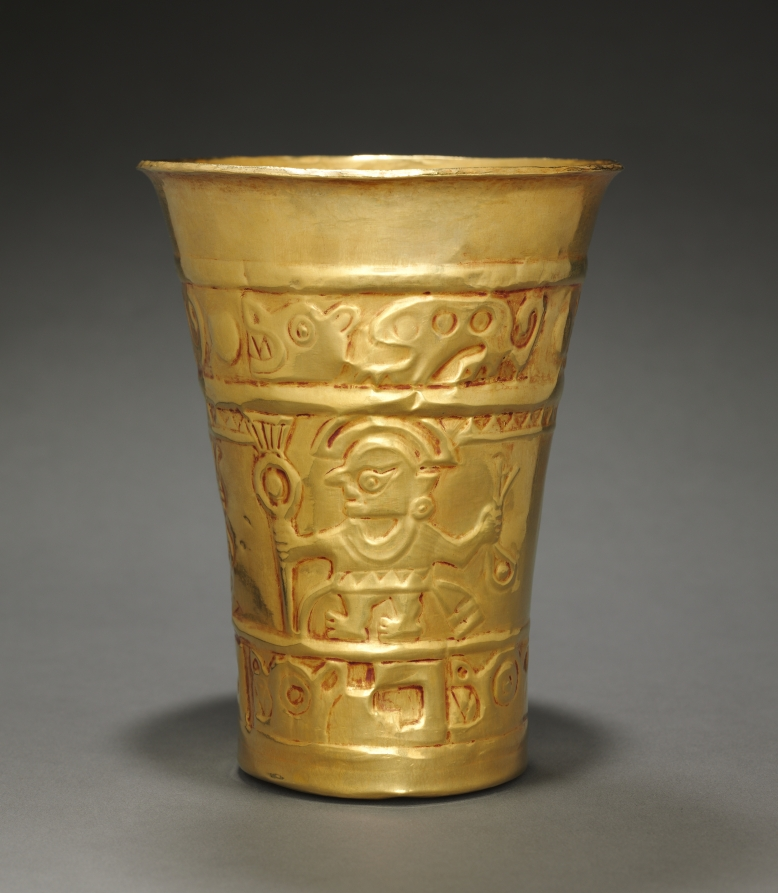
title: Beaker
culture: Peru, North Coast, Sicán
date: c. 800–1370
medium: hammered and embossed gold alloy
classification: Metalwork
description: Profile figures are unusual in Sicán metal beakers. The presence of such figures is one reason the museum is undertaking research to determine whether this vessel is authentic.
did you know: Embossed in the central band of this cup are warriors carrying clubs and slings.